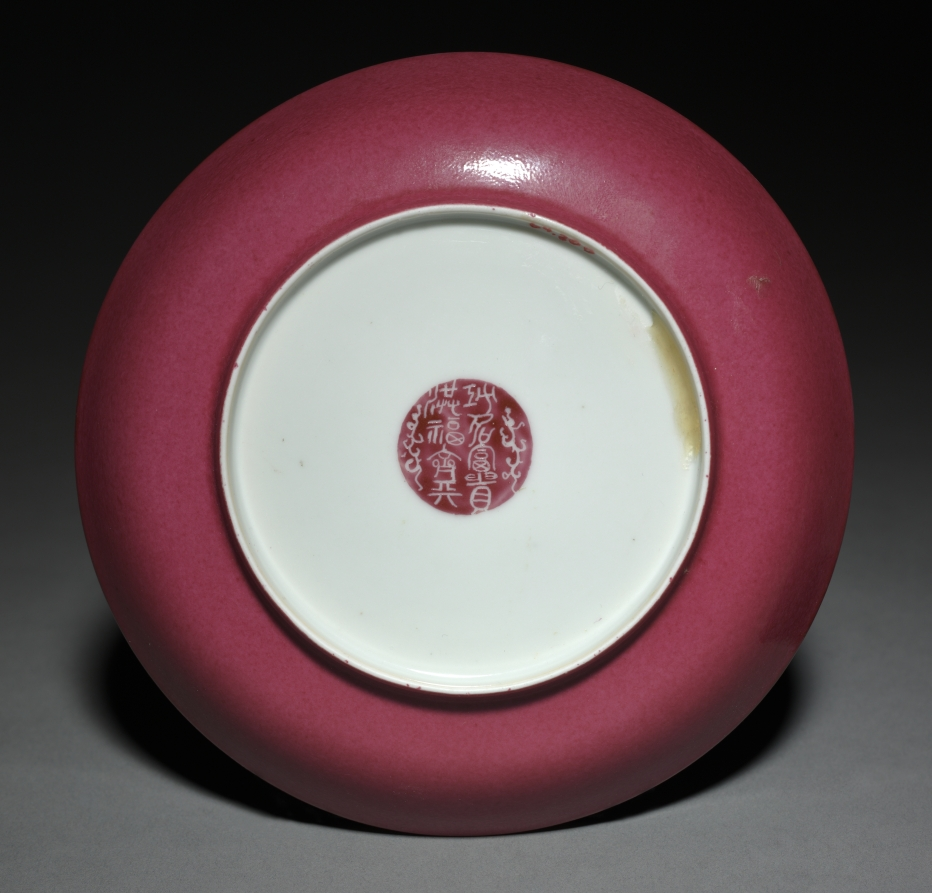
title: Dish with Two Cocks in Landscape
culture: China, Jiangxi province, Jingdezhen kilns, Qing dynasty (1644-1911), Yongzheng mark and reign (1723-35)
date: 1723–35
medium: porcelain with famille rose overglaze enamel decoration (interior) and ruby monochrome enamel decoration (exterior)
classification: Ceramic